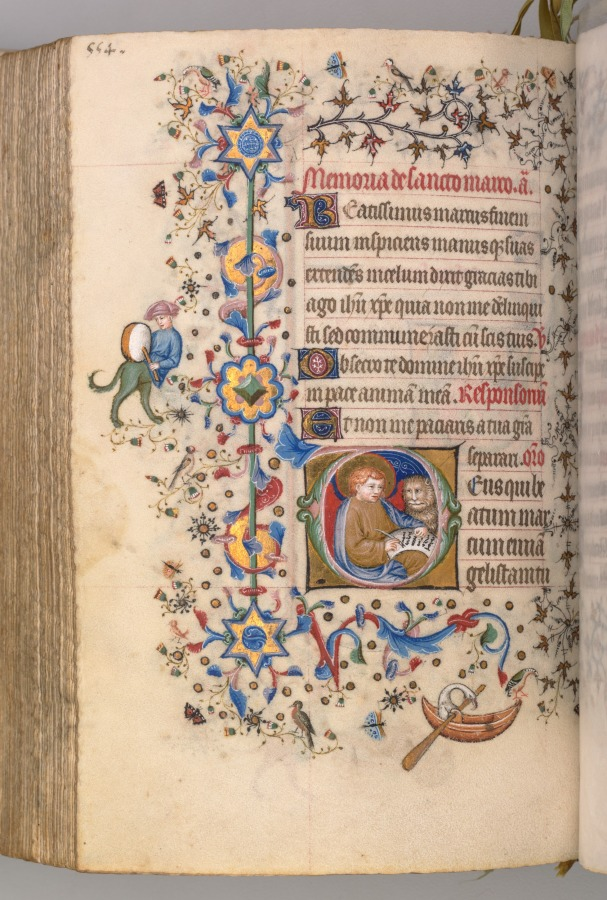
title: Hours of Charles the Noble, King of Navarre (1361-1425): fol. 271v, St. Mark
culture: France, Paris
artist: Master of the Brussels Initials and Associates (French)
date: c. 1405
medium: ink, tempera, and gold on vellum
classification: Bound Volume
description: This precious volume was obviously highly prized by its owner, the French-born King of Navarre, who had his coat of arms painted on no less than twenty folios. Rather than directly commissioning this manuscript from a specific workshop, it seems that Charles the Noble acquired his book of hours -- perhaps ready-made for the luxury market -- while on a trip to Paris in 1404-05. A collaborative effort, six painting styles are evidenced within the pages of this codex, those of two Italians, two Frenchmen, and two Netherlanders. The painter who was responsible for the planning and decoration of the book, and who produced seventeen of the large miniatures, was a Bolognese artist known as the Master of the Brussels Initials. His principal assistant, responsible for most of the borders, was a Florentine who signed his name "Zecho" da Firenze on folio 208 verso.